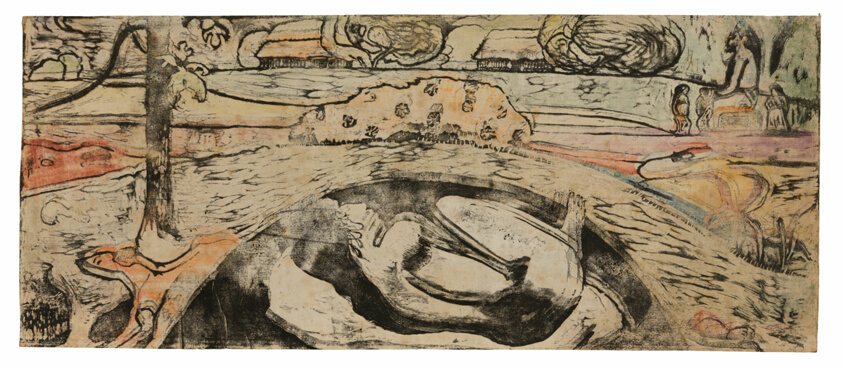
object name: Print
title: Manao tupapau (She Thinks of the Ghost or The Ghost Thinks of Her)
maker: Paul Gauguin (French, 1848-1903)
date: 1894/95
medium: Wood-block print, printed twice in black ink, with brush and stencil-applied red, orange, yellow, green, blue, violet, and brown watercolors on ivory Japanese paper, laid down on cream Japanese paper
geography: France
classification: woodcut; print; prints and drawing